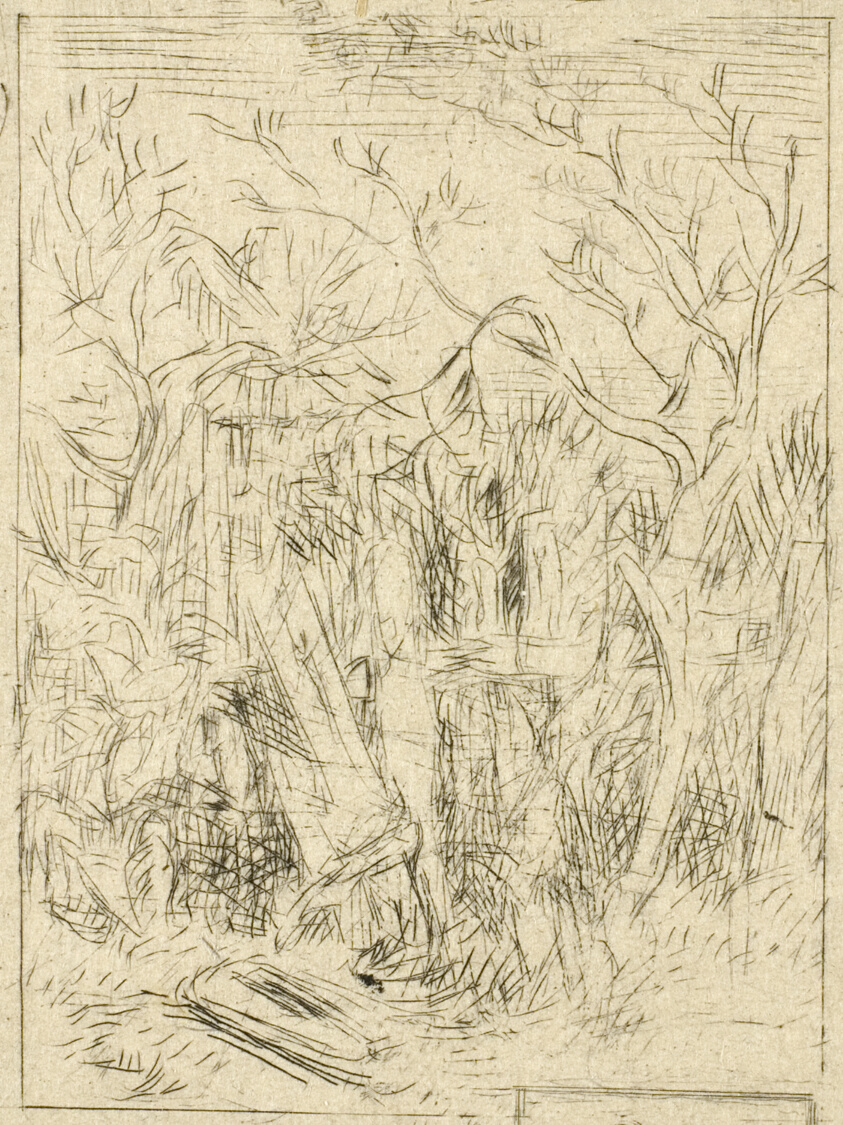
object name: Print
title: Untitled (Landscape)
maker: Charles Émile Jacque (French, 1813-1894)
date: c. 1843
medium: Drypoint and roulette on ivory wove paper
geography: France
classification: drypoint; print; prints and drawing